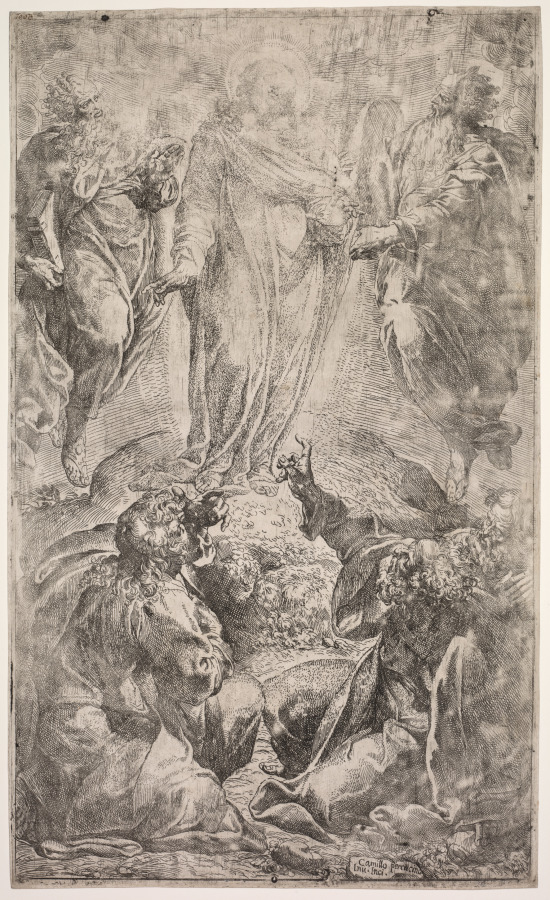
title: The Transfiguration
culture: Italy, 16th century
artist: Camillo Procaccini (Italian, 1546–1629)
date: 1587–90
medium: etching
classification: Print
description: The Transfiguration of Christ is viewed as a prefiguration of the Resurrection. Three of Christ's followers, Peter, James, and John, accompanied him to a remote hill, where they saw him "transfigured before them; and his face did shine as the sun, and his garments became white as the light" (Matthew 17:2). The disciples saw and heard Elijah and Moses talking with Jesus, then hearing the voice of God they fell on their faces. When they looked up, the vision had vanished and Jesus was himself again.